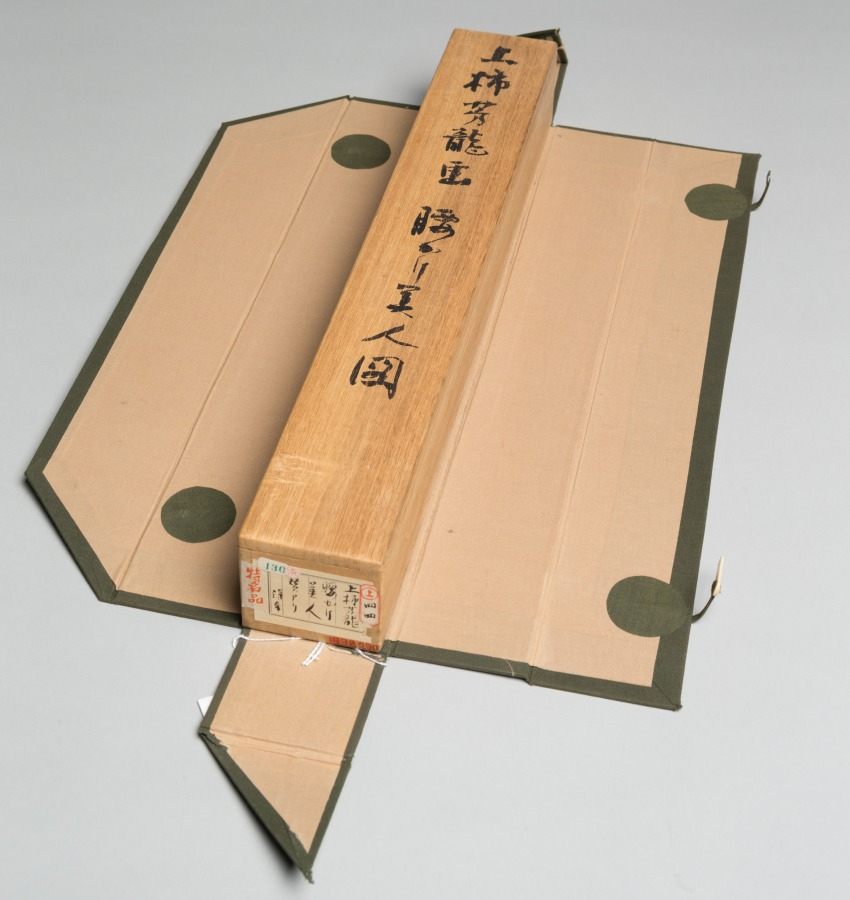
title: Courtesan Seated on a Bench Enjoying the Evening Cool in Summer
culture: Japan, Edo period (1615–1868)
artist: Kamigaki Hōryū (Japanese, dates unknown)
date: 1615–1868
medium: hanging scroll, ink and color on silk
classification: Painting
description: In a pensive pose with her chin resting in her hand, a courtesan is seated on a wooden bench that extends diagonally across the lower half of the scroll. Her open robe suggests that it is a warm evening-perhaps late summer or early fall, as indicated by the grapevine pattern on her kimono. The floral patterns in the composition hint at the seasons: the plum blossom on the fan for spring; grape pattern on the robe for late summer; and chrysanthemum design on the bench indicating autumn. Note also how the grapevine pattern in the painting's mounting mimics the design of her kimono. The overall mood is one of intimacy, created by Hõryþ through the delicate rendering of the courtesan's facial features and hands. In contrast to the other scrolls of beauties nearby, the artist here portrayed his subject with little background, allowing her grace and elegance to carry the picture.